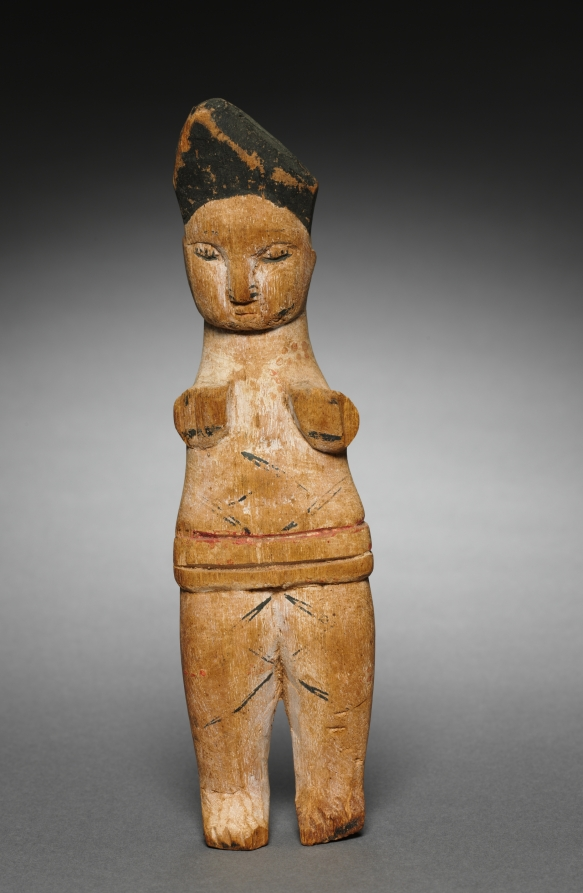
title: Doll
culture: Africa, West Africa, Nigeria, Ibibio style, unknown artist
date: 1900s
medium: Wood, kaolin, and paint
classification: Sculpture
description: Young Ibibio girls would play with dolls for fun. The dolls also took on deeper significance when a girl entered seclusion to go through preparations for adulthood and marriage, representing her future children and promoting her fertility. The kaolin (white clay) that once covered the figures' bodies has been worn off, possibly through handling during play. Thin lines represent uli, a kind of body painting. Upraised, foreshortened hands with open fingers were typical of dolls carved by Ibibio people from the Anang group.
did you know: Dolls like this were sold at markets where they were purchased as symbolic playthings for girls or souvenirs for tourists.